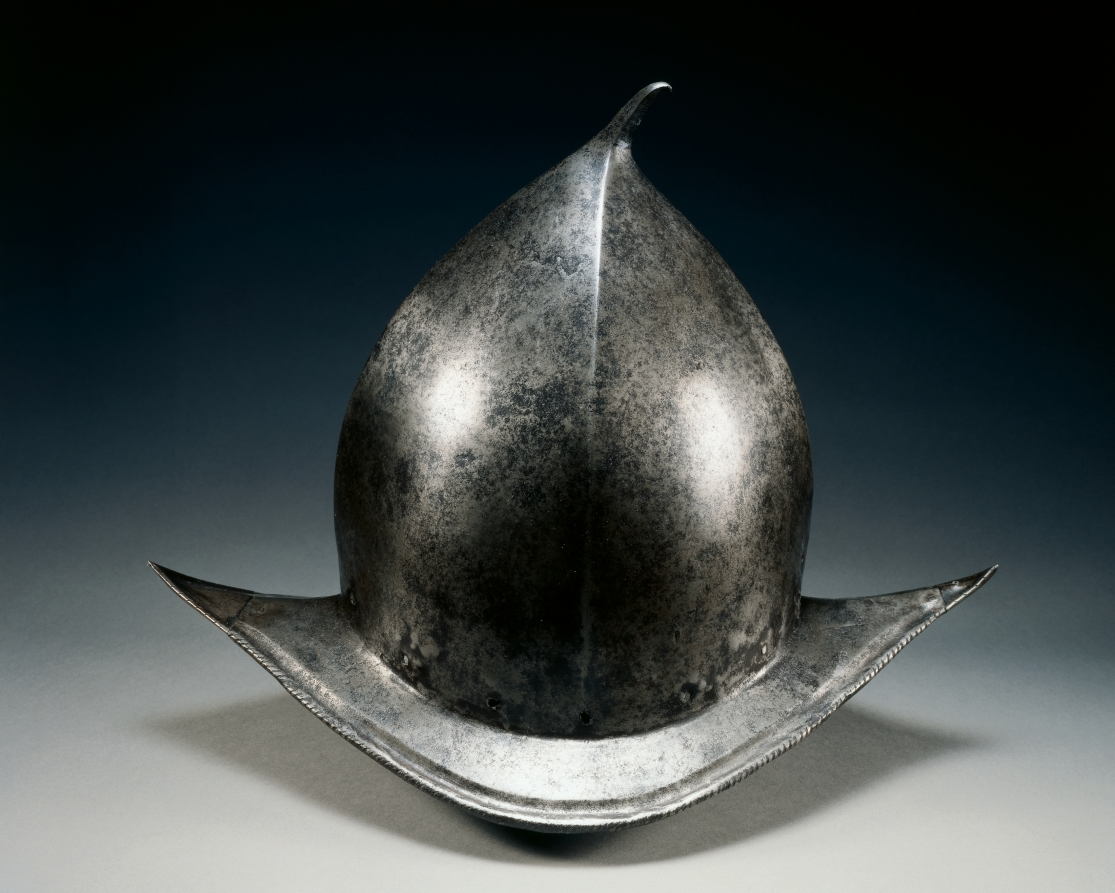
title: Pear-Stalk Cabasset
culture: Italy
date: c. 1580–90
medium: steel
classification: Arms and Armor